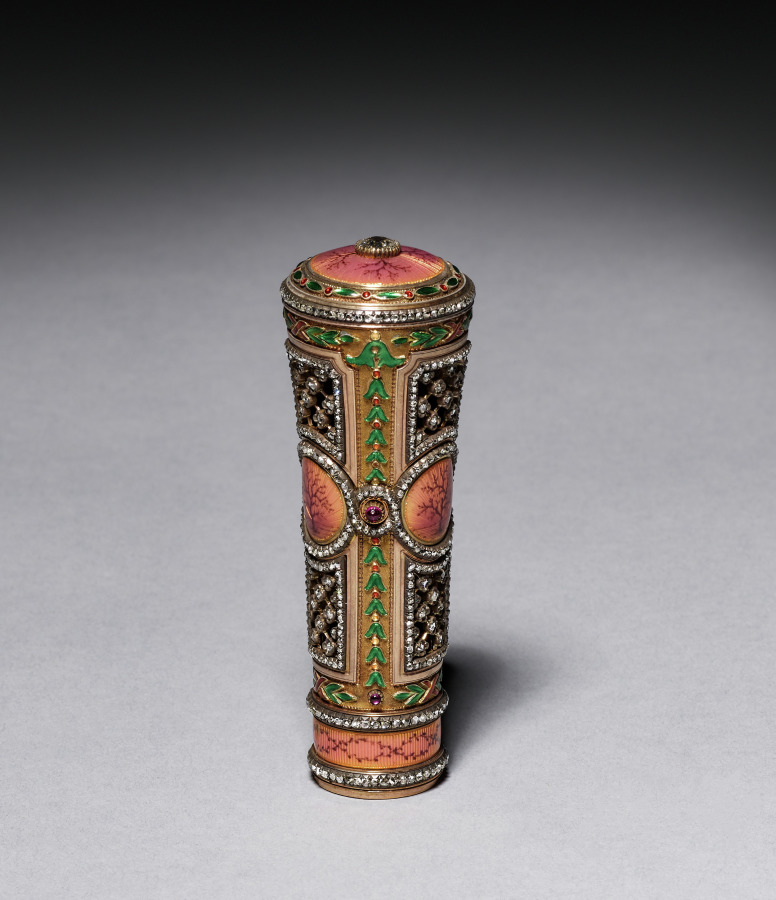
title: Parasol Handle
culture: Russia, St. Petersburg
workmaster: Michael Evlampievich Perchin (Russian, 1860–1903)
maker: House of Fabergé (Russian, 1842–1918)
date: c. 1886–1903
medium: Gold, enamel, diamonds, and platinum filigree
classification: Metalwork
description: Women devised many methods to protect themselves from the sun when strolling outside at the end of the nineteenth century. One constant barrier from the harsh rays was the daytime parasol which looked like an umbrella but was used strictly for shade. The House of Fabergé specialized in providing fashionable wealthy ladies with bejeweled handles such as this example, which could be screwed directly into the end of the parasol shaft when a more formal look was desired.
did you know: A wealthy lady around 1900 could unscrew her jeweled parasol handle and take it with her for safekeeping or swap it for another color.